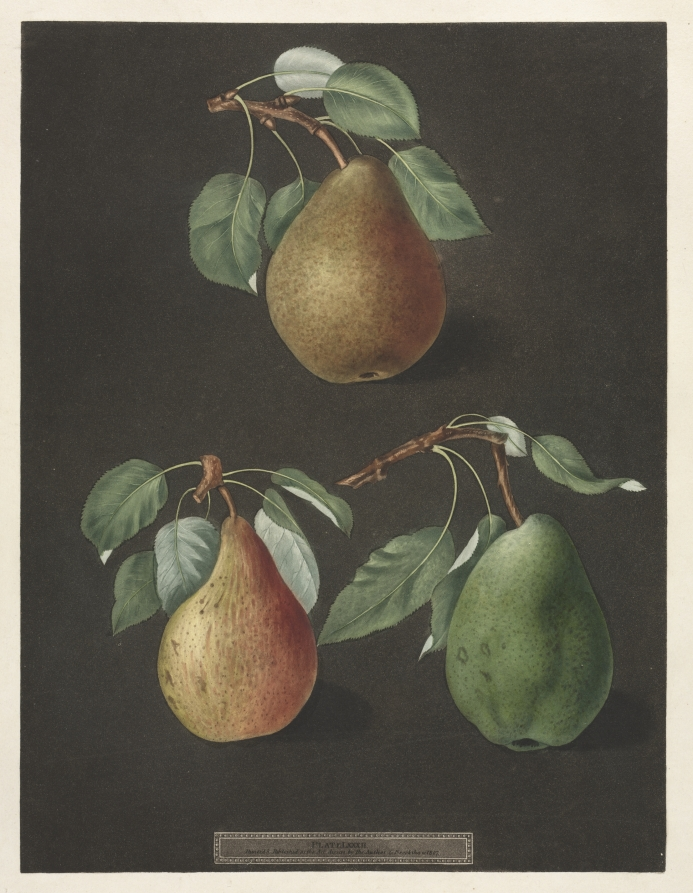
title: Pomona Britannica: No. 82 - Pears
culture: England, 19th century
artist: George Brookshaw (British, 1751–1823)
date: 1807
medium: aquatint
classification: Print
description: Pomona Britannica illustrates fruits cultivated at Hampton Court Palace’s gardens, the most celebrated around London. It was devoted to the most handsome varieties of fruit cultivated in England. Most of the 90 plates in this large and sumptuous book, like these, have dark aquatint backgrounds.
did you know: Though pears mature on the tree, they ripen best after being plucked.